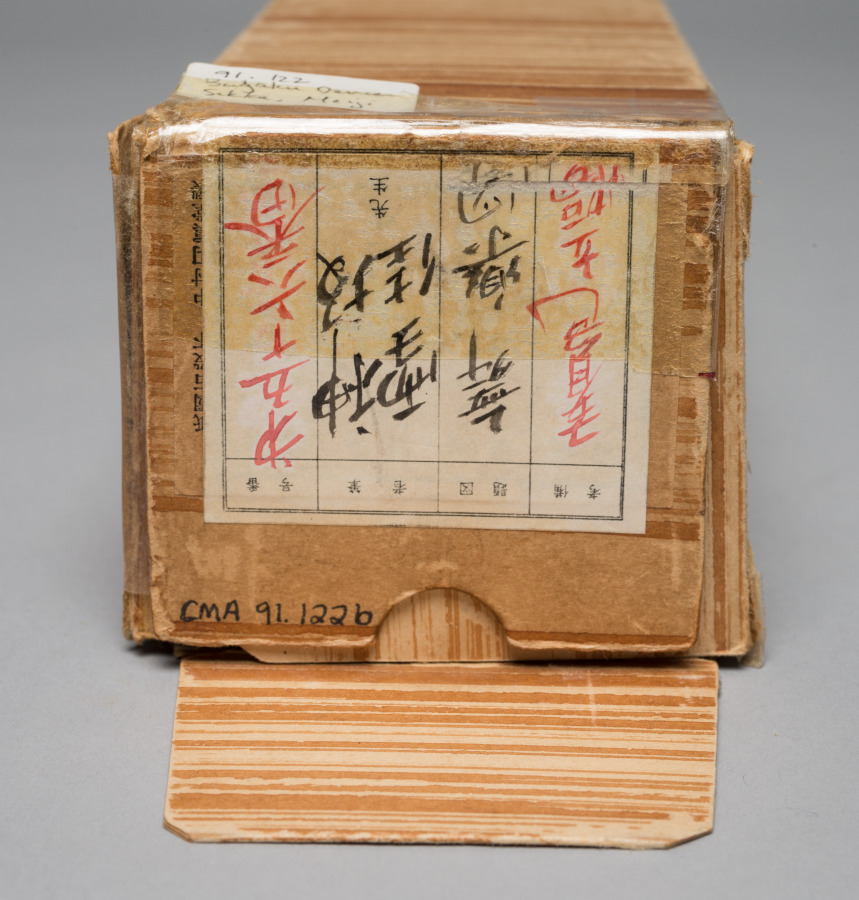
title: Bugaku Dancer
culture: Japan, Meiji period (1868–1912) to Shōwa period (1926–89)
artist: Kamisaka Sekka (Japanese, 1866–1942)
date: c. 1890–1942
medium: hanging scroll; ink and color on silk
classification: Painting